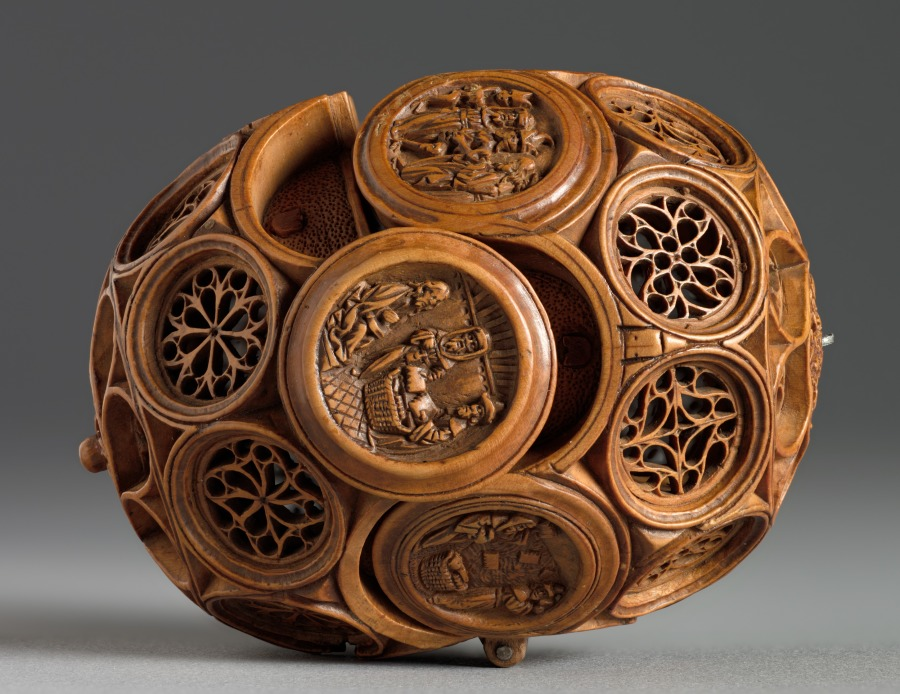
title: Prayer Nut with Scenes from the Life of St. James the Greater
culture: Northern Netherlands (Holland)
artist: Adam Dircksz (Netherlandish, active c. 1500)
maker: and Workshop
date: c. 1500–1530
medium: boxwood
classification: Sculpture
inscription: Interior around lower half: SANCTVS SACRILEGI STAT IVDICIS ANTE TRIBVNAL (Holiness stands before the throne of the profane judge)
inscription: Interior, around upper half: GAVDENS PRO CRISTO IACOBVS SVBDIT CAPVT ENSI (St James submits his head to the sword)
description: Prayer nuts are capsules that can be opened in half and were mainly worn from the end of the 1400s until 1530, particularly in the Netherlands. These objects are generally made from boxwood and carved with extreme refinement and delicacy. They often echo Gothic architecture and include openwork tracery or elaborate decorative patterns. Prayer nuts came into fashion for private devotion as a pendant on the rosary or on a decorative chain. The emergence of prayer nuts went hand in hand with the practice of praying the rosary more frequently at the end of the Middle Ages.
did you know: This miniature masterpiece was held and caressed within the palm of the holder as they prayed and meditated on their faith. What do you use to focus or engage in quiet concentration?